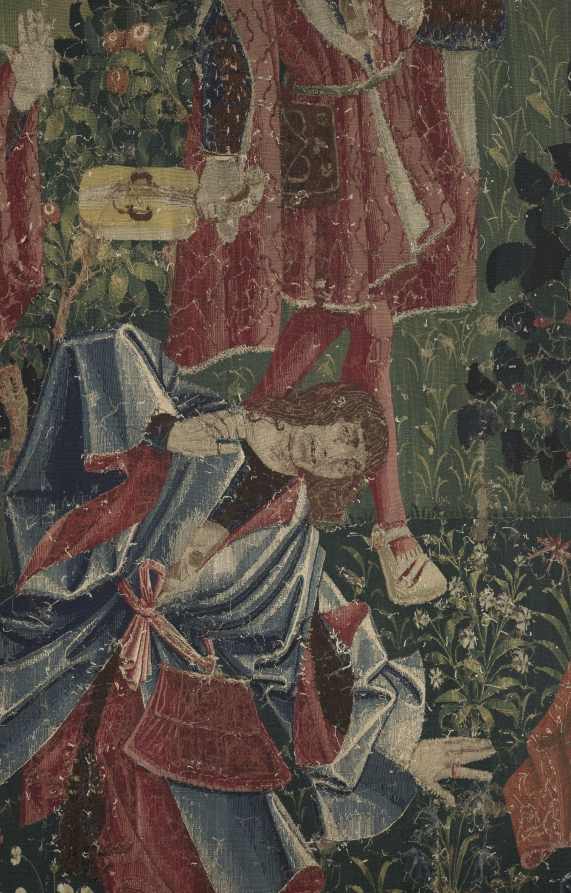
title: Youth (from Chateau de Chaumont set)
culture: France, Lyon(?), early 16th century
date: 1512–15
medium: silk and wool; tapestry weave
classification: Tapestry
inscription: French verse in Gothic letters translates as follows: Youth triumphs while its heart is healthy, And when it seems to hold all in its hand. But this triumph is without eternity. Here one sees the example full well: Those who are happy hide death in thier heart. Let the young heed this warning.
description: Louise of Savoy (1476-1531), queen mother of King Francis I, is depicted here in a sumptuous brocaded velvet in the center. She addresses youthful figures including Éléonore, Pierre Sala’s daughter who is facing her future husband, Hector. On the right, King Louis XII (died 1514) stands in front of the Chateau Langais where he had married Anne of Brittany. Above is Hector’s deceased father with a partially concealed skull under his robe, while a woman expresses surprise at the sight. The verse in Old French at the top states that youthful happiness is not eternal: Youth makes sounds as long as its heart is healthy, And thinks that it holds all in its hand. But this triumph is not eternal. Here you see clearly an example: He that is happy has death in his breast. Of this you people should take note.